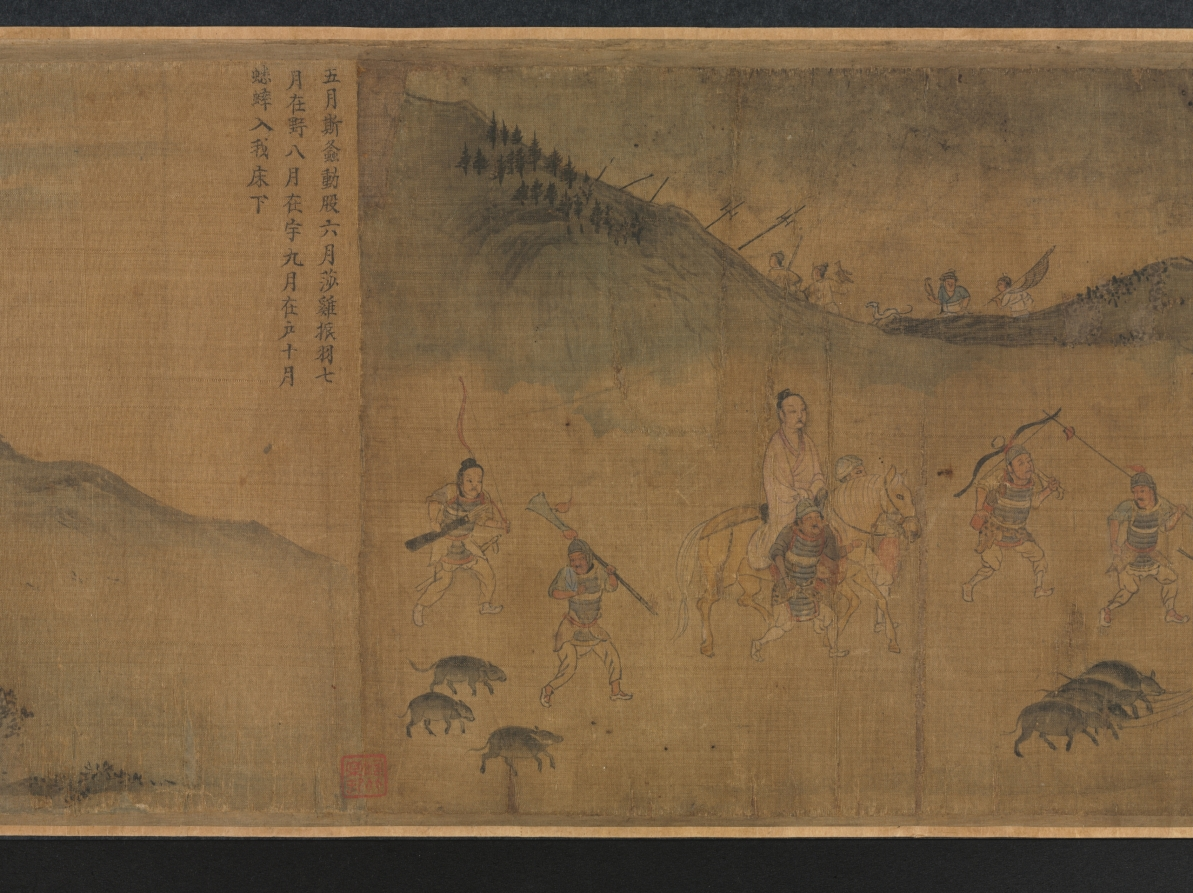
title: "Seventh Month" from the Odes of Bin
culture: China, Southern Song dynasty (1127-1279)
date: 1200s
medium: Handscroll; ink and color on silk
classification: Painting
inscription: Colophons: 1. [on the frontispiece] by the Qianlong emperor (dated 1741). 2. by Lu Wan (dated Zhengde dingchou, 1517). 2. by the Jiaqing emperor (dated 1807).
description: According to Confucian thought, the ruler looks after the well-being of his people which involves agricultural activities. Seventh Month from the ancient Odes of Bin in the Shijing (Book of Poetry) describes occupations throughout the year, including plowing, harvesting, hunting, making clothes, and observing rituals. The earliest illustrations of these Odes accompanied by text were commissioned by Southern Song emperor Gaozong (reigned 1127–1162). As the lower Yangzi delta had become the new seat of government, Gaozong had sets of these illustrations produced by court artists to revive the dynasty and convince the Confucian officialelite of his legitimacy to rule.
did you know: The Odes of Bin appears in the classic Shijing (Book of Poetry), an anthology of more than 300 poems, folk songs, and ceremonial hymns that were originally chanted to music.